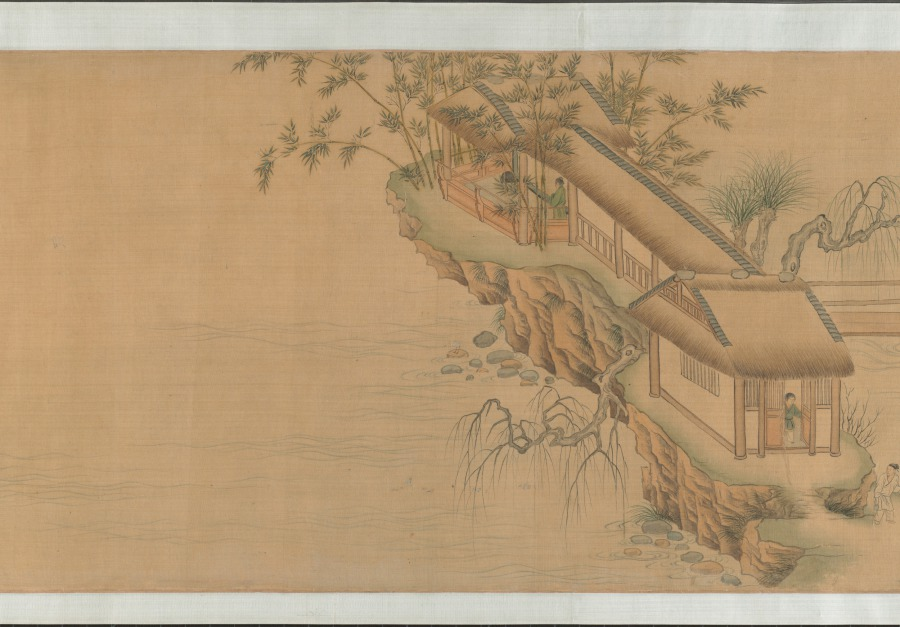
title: Garden for Solitary Enjoyment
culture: China, Ming dynasty (1368–1644)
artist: Qiu Ying (Chinese, 1494–1552)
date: 1515–52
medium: Handscroll; ink and light color on silk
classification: Painting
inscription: Accompanying text of an essay together with seven poems of Sima Guang (1019–1086) and one poem of Su Shi (1037–1101) written by Wen Zhengming (1470–1559) in 1558.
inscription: 2 colophons and 82 seals: 4 seals of Wen Zhengming 文徵明 (1470–1559); 59 seals of Xiang Yuanbian 項元汴 (1525–1590); 1 colophon, dated 1644, and 7 seals of Xiang Yukui 項禹揆 (c. late 1500s–1659); 1 colophon, dated 1880, and 2 seals of Weng Tonghe 翁同龢 (1830–1904); 2 seals of Ch'eng Chen-i (19th c.); 1 seal of Han Ch'ung (19th c.); 4 seals of Wan-go H. C. Weng 翁萬戈 (1918–2020); 3 seals unidentified.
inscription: Colophon by Xiang Yukui 項禹揆 (c. late 1500s–1659): The painting of The Garden for Self-enjoyment on the right by Shih-chou, Mr. Qiu [Qiu Ying] is in the style of Li Lung-mien. Its mood is peaceful, as if meeting the ancient gentlemen face to face among the brushes and silk; it lifts one above the sordid bustle of life. Formerly, my late father handed me this scroll which had only the painting without the written essay. I considered asking a good calligrapher to write the essay to add to it but was afraid that the quality of the writing would not match the painting. Several years later, I saw at a friend's house this essay and poems (of Ssu-ma Kuang] written by Hengshan [Wen Zhengming], once owned by my grandfather; so I spared no expense to obtain it. I rejoiced at this and said: "The divine swords are finally united. How things are pre-destined!" Now my friend Chang Kung-chao's technique for mounting [painting and calligraphy] is excellent. Therefore by daring to take them out and join them together, I can preserve this beautiful story of singular reunion. Xiang Yukui recorded at Hai-yeh-t'ang [hall] two days before New Year's Eve in the jiasheng year of the Chongzhen era [1644]. trans. LYSL/HK/WKH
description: Garden of Solitary Enjoyment refers to a site built in 1073 by the statesman Sima Guang (1019–1086) after he had retired to Luoyang, Henan province. Every spring, visitors would flock to his garden. Each of its seven structures references a historic figure. Sima wrote: I channel streams [like Du Mu], to water flowers [like Bai Juyi], or trim bamboo [like Wang Huizhi]. . . . I know of no joy between heaven and earth that could take its place. Qiu Ying’s painting, created after an 11th-century version of the same theme, must have appealed to garden owners of the Ming dynasty, since it became the template for numerous Suzhou workshop copies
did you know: Sima Guang completed his monumental survey of Chinese history, Zizhi tongjian, in the garden depicted in this painting.